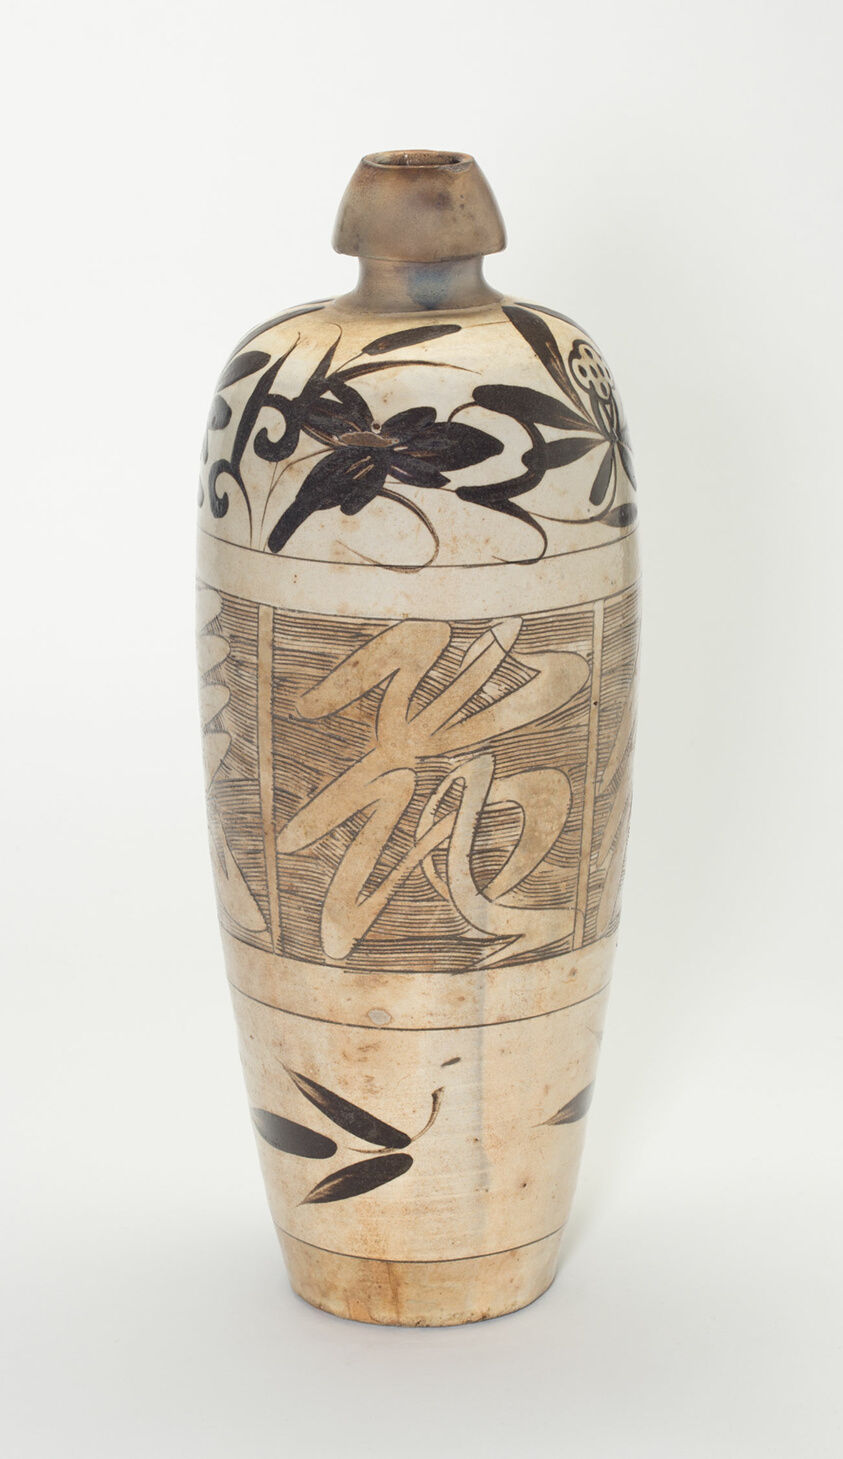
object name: Vessel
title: Elongated Ovoid Vase (Meiping) with Stylized Flowers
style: Chinese (culture or style)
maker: China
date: Jin dynasty (1115–1234), 12th century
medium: Cizhou ware; slip-coated stoneware with incised, combed, and overglaze painting in iron brown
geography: China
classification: vase; vessel; stoneware; asian art; ceramics